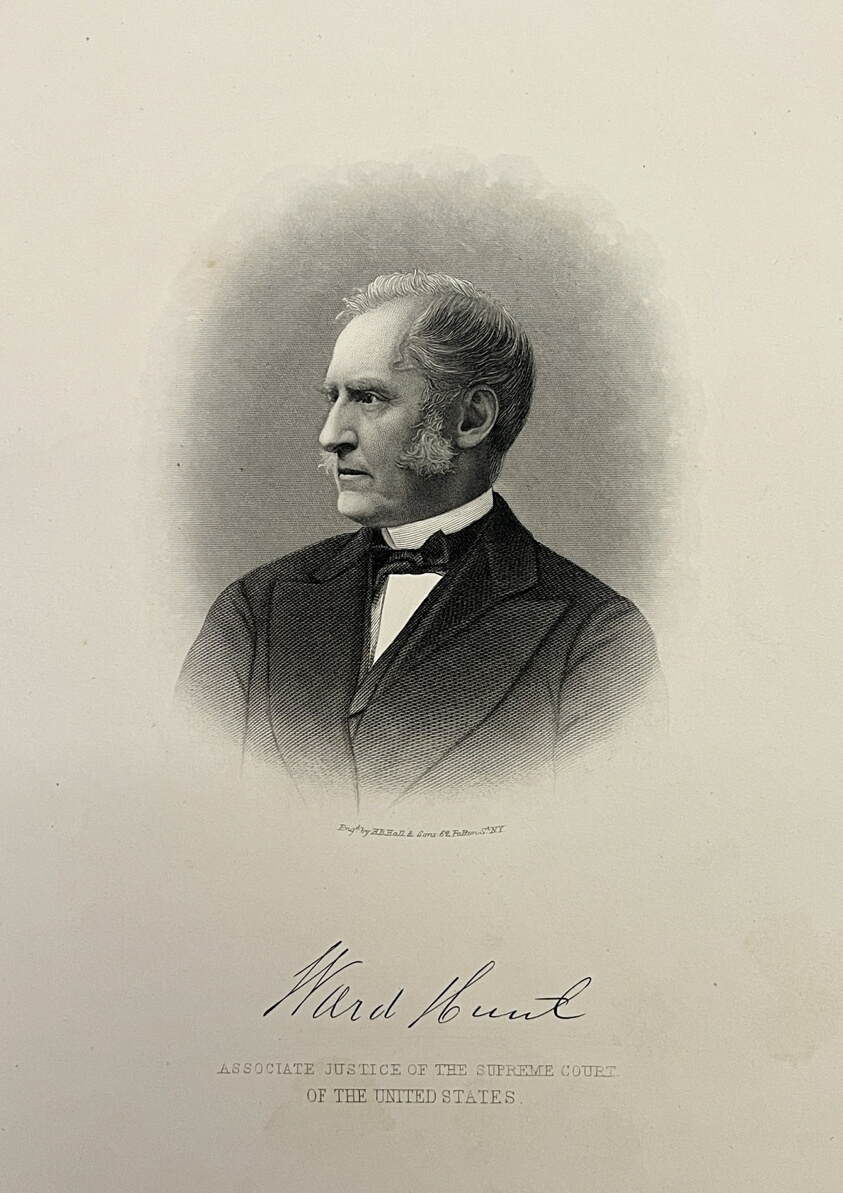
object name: Print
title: Ward Hunt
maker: Henry Bryan Hall (American, 1808-1884)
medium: Steel engraving on paper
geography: United States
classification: reproduction; print; prints and drawing